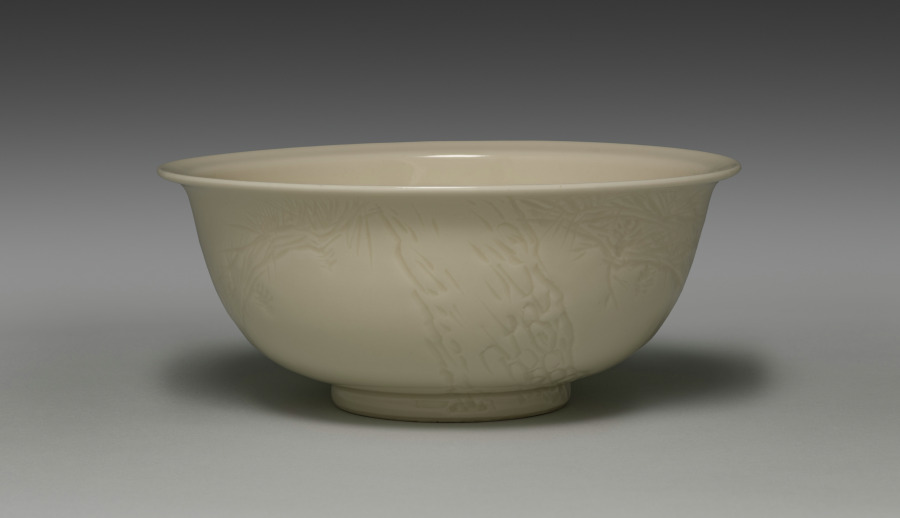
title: Bowl with Old Pine and Poem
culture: Japan, Taishō period (1912–26) or Shōwa period (1926–89)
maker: Seifū Yohei IV (Japanese, 1872–1951)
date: 1914–46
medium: Porcelain with molded and carved design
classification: Ceramic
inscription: 鶴樹君子風拂太平枝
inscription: 清風造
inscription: 清風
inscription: 成山清風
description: A grand, aged pine is carved into the body of this bowl. The inscription on the reverse side explains the tree’s presence. It is an altered version of two lines from a poem by Li Jiao (646?–715?) called “Pine.” Li Jiao was a senior government official who had a tumultuous career under the reign of Wu Zetian (r. 690–705), as well as those of her sons and grandson during the Tang dynasty (618–907). Although little known today, his work was read in Japan during the Heian (794–1185) and Kamakura periods (1185–1333). An anthology containing his poems, which was lost in China, was passed down across the generations in Japan. The translation of the inscription is as follows (the original characters, written and read from right to left, are shown below from left to right): The crane nests in the mastwood tree, the wind flicks at its peaceful branches. 鶴樹君子風拂太平枝 The mastwood is a pine-like evergreen, and the crane sheltering there is protected from the wind. In the original poem, the characters before “branches” (枝) are rather 大夫, meaning “high official.” This is likely a reference to the title bestowed upon a pine tree by the emperor Qin Shi Huang (r. 221–210 BCE) in thanks for its protection when a fierce rain fell as he ascended Mount Tai to pay his obeisance to the heavens.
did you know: The box inscription identifies the bowl's glaze as kanpakuyū, "bright-jewel white glaze."